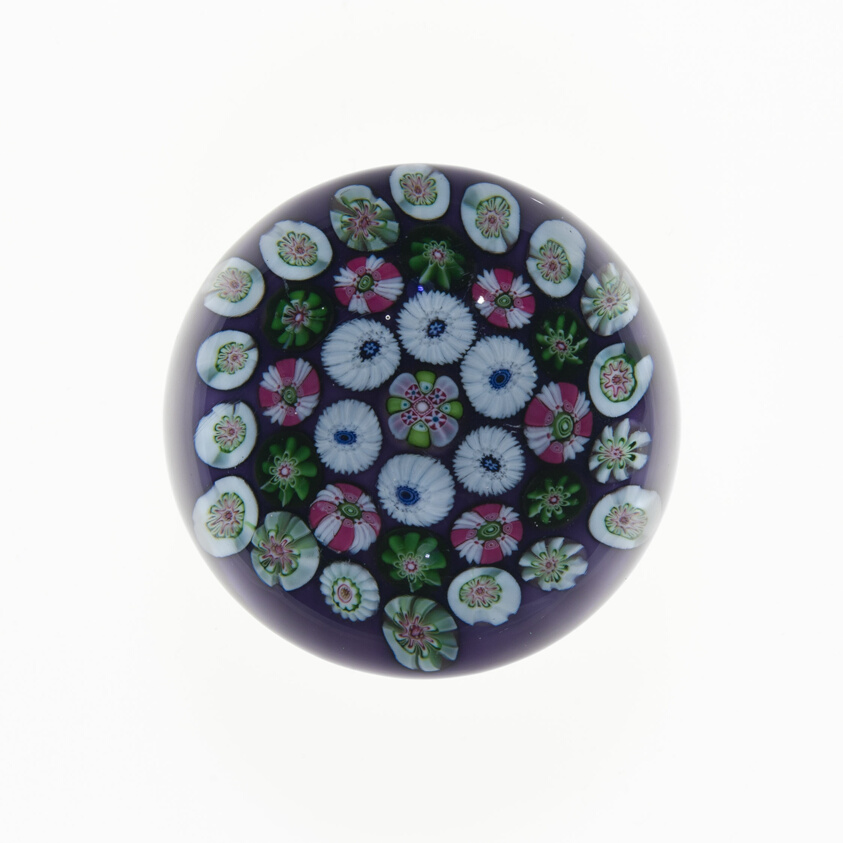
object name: Glass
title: Paperweight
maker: Clichy Glassworks (Cristalleries de Clichy); Clichy, France, 1837-1885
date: 19th century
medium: Glass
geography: Clichy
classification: paperweight; millefiori; european decorative arts; glass